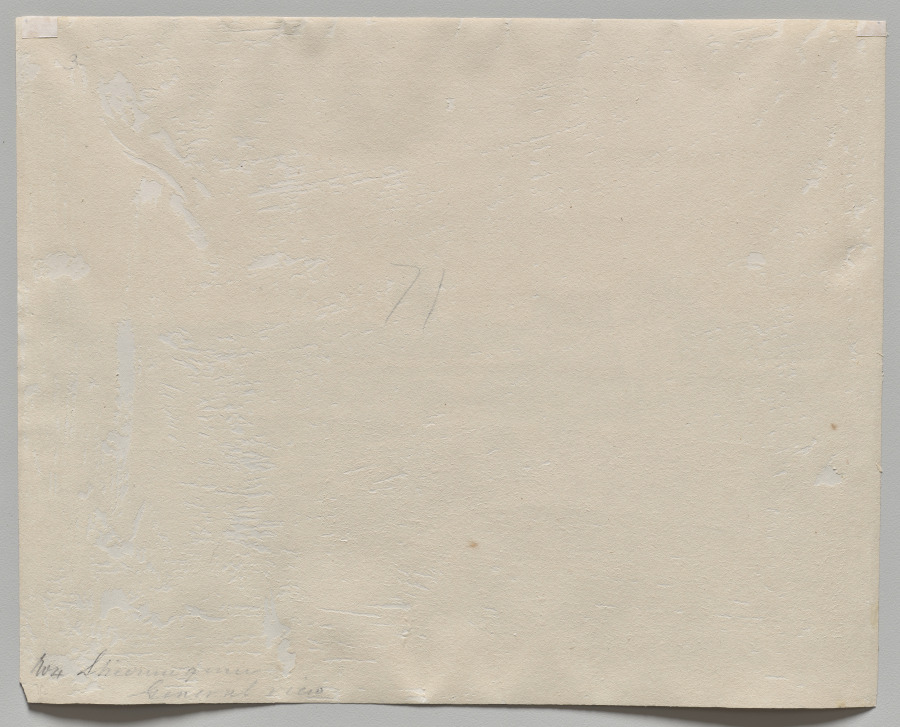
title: View from the Top of the Rock, looking over the native Town, Trichinopoly, India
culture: India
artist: Nicholas & Co. (British, active India, 1873–1905)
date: 1878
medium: albumen print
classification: Photograph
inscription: Embossed stamp at bottom right: "Nicholas & Co. Madras"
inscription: Written in graphite on verso: "71 Sheeruu Guru General View (?)"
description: The Ranganathaswamy Temple, dedicated to the god Vishnu, originated in the 1st century CE and is still active today. This view sets the gopura (temple entrance towers) in their urban context and juxtaposes the vast scale of the complex against the much humbler buildings where the Indian population lived and worked. To see carvings inside the temple complex, look at 2015.37 in the collection.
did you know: The towers in the background mark the largest temple compound in India, which occupies 156 acres.